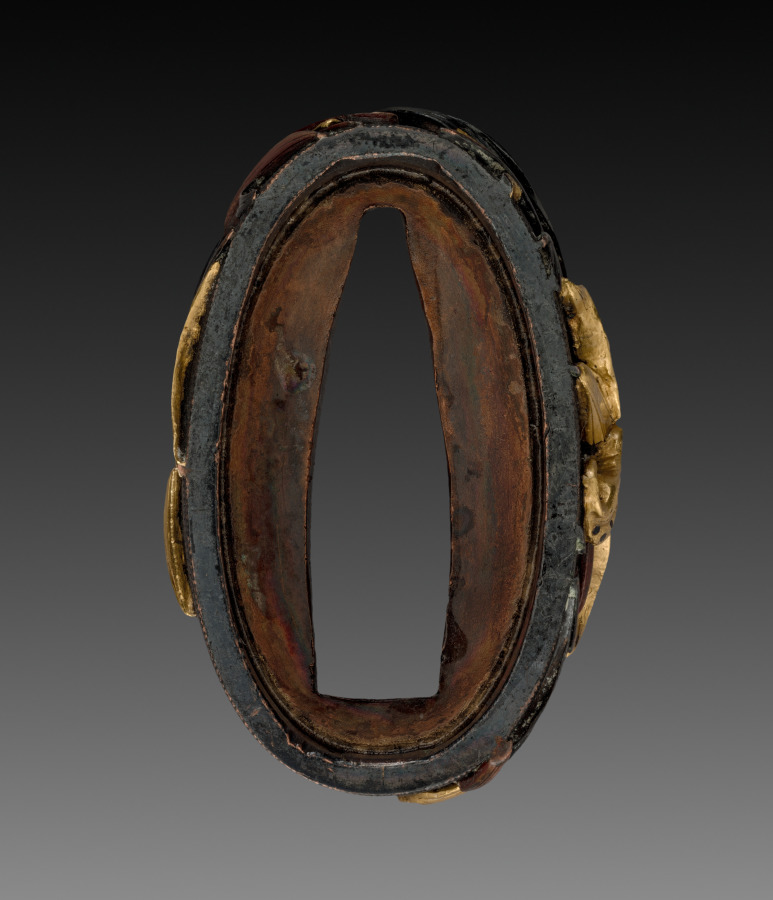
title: Sword-Hilt Collar (Fuchi)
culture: Japan, Edo period (1615–1868)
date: 1700–1850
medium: shakudo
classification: Arms and Armor